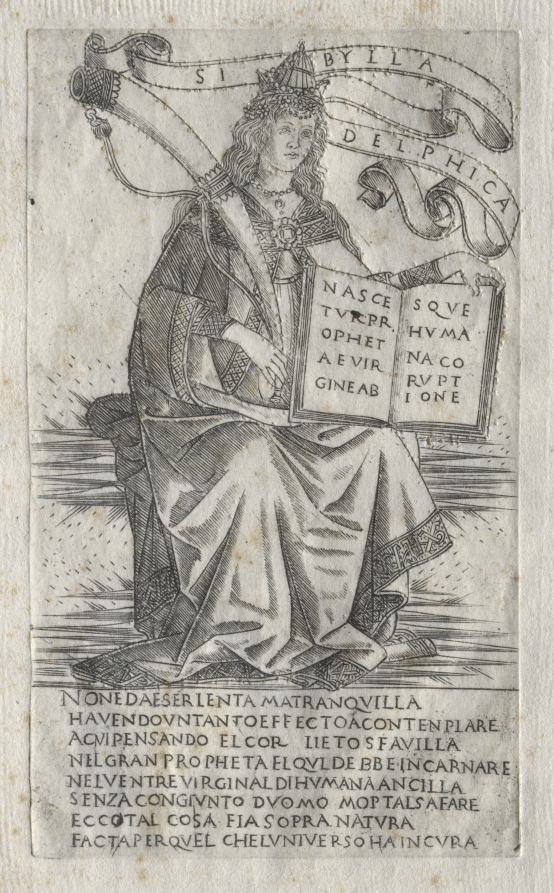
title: The Sibyls: The Delphian Sibyl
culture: Italy, Florence, 15th century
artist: attributed to Francesco Rosselli (Italian, 1448-about 1513)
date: 1400s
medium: engraving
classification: Print